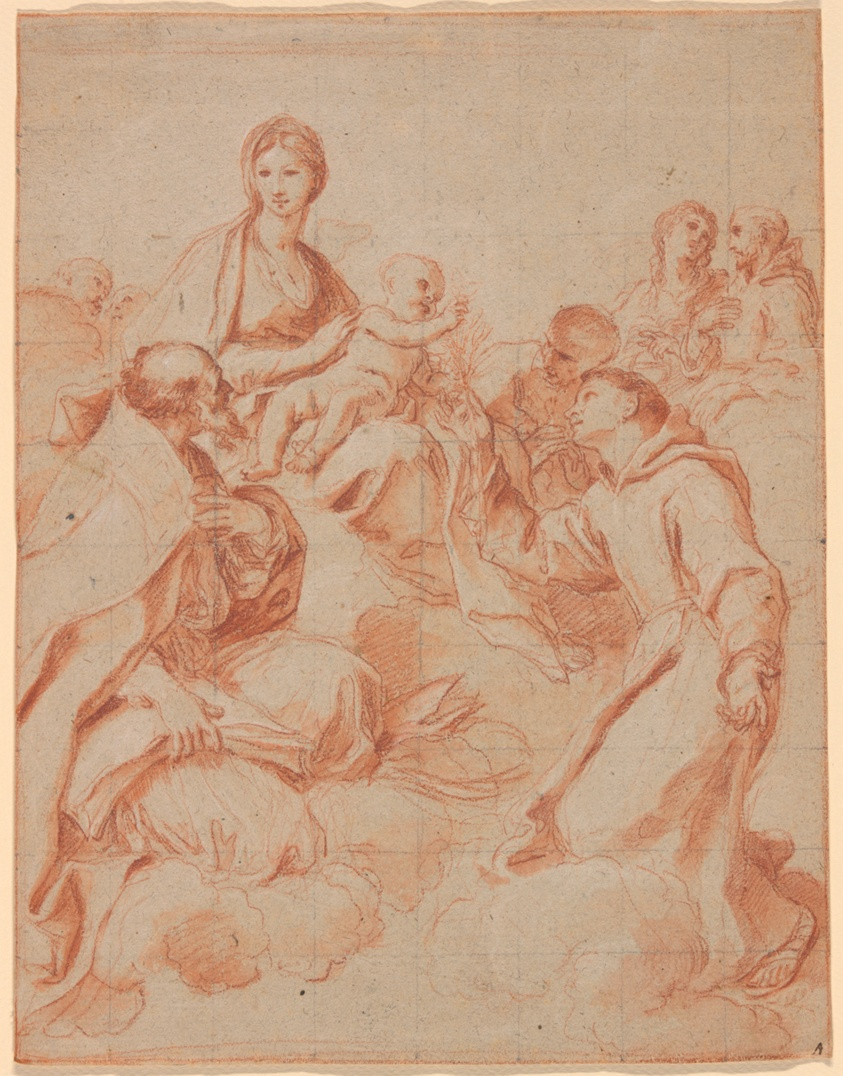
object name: Drawing and Watercolor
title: The Virgin and Child with Saint Anthony of Padua Handing a Lily to the Child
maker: Andrea Sacchi (Italian, 1599-1661)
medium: Red chalk, with brush and red chalk wash, squared in black chalk, on tan laid paper, ruled in red chalk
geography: Italy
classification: chalk; wash; drawings (visual works); prints and drawing